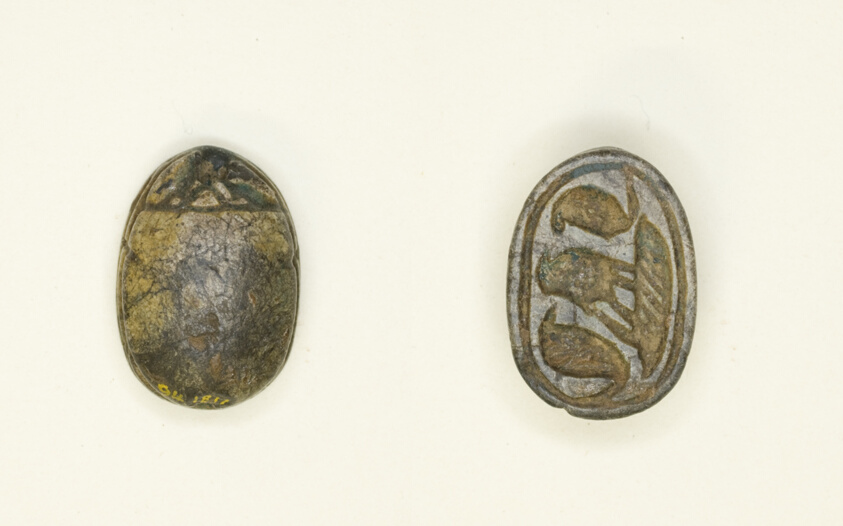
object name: Costume and Accessories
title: Scarab: Confronted Cobras with Falcon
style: second intermediate period, hyksos, fifteenth dynasty, egyptian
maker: Egyptian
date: Second Intermediate Period, Dynasty 15 (about 1650–1550 BCE)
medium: Glazed steatite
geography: Egypt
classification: scarab; ancient art; costume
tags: scarab beetle, snakes, serpents, falcons